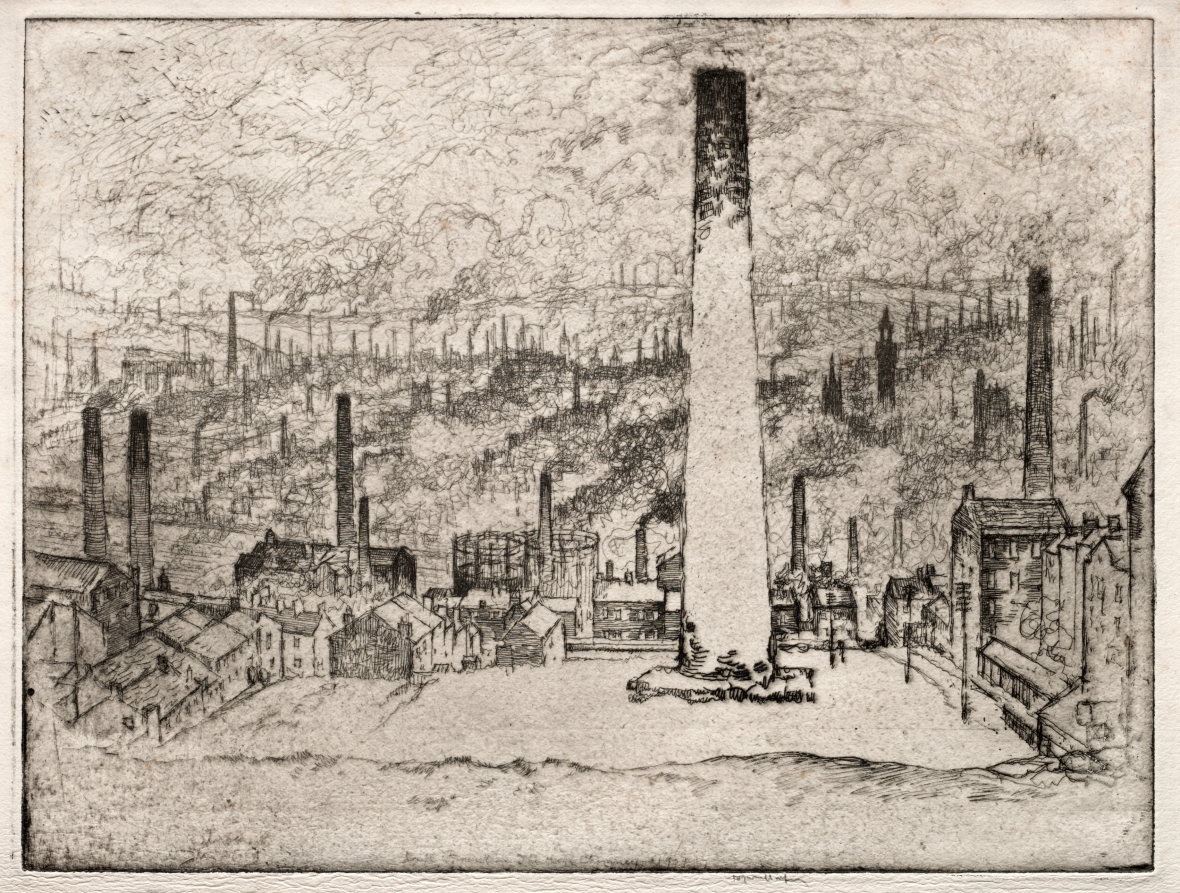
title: The Great Chimney, Bradford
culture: America, late 19th-early 20th Century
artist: Joseph Pennell (American, 1857–1926)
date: 1909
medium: etching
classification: Print